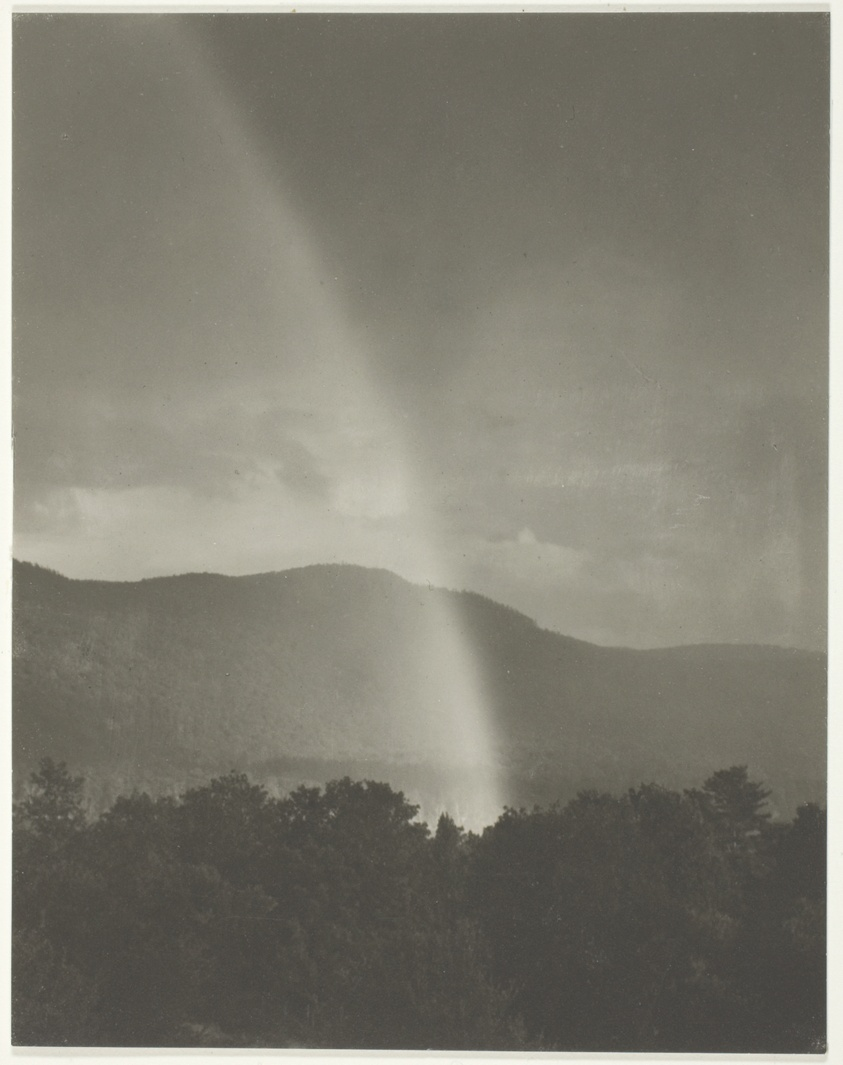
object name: Photograph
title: Rainbow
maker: Alfred Stieglitz (American, 1864–1946)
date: 1920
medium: Gelatin silver print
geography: United States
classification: gelatin silver (developing-out-paper) pr; photographic process; photography; photograph